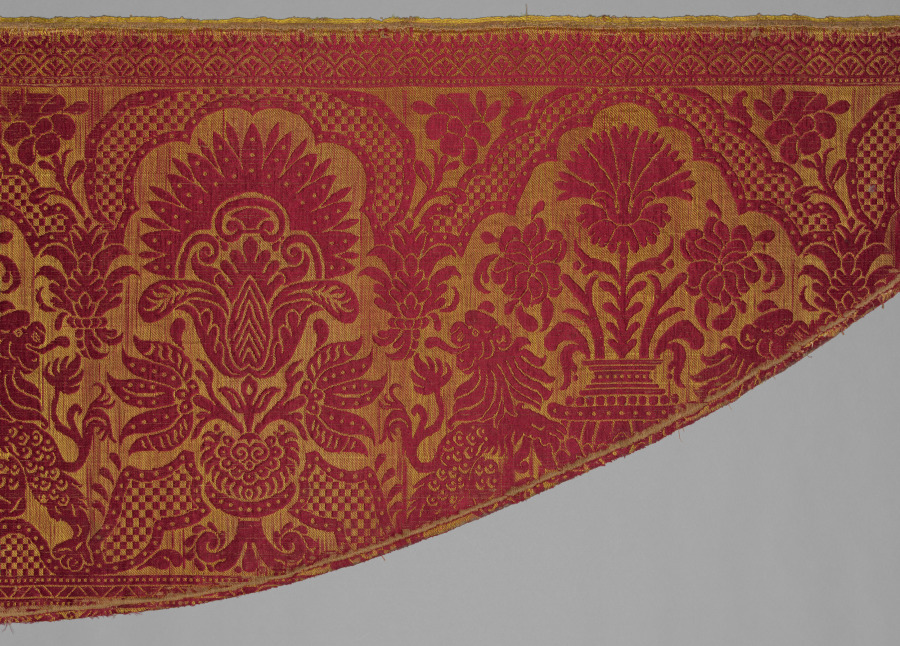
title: Silk and Hemp Fragment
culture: Spain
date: 1500s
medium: plain compound satin: silk and hemp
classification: Textile